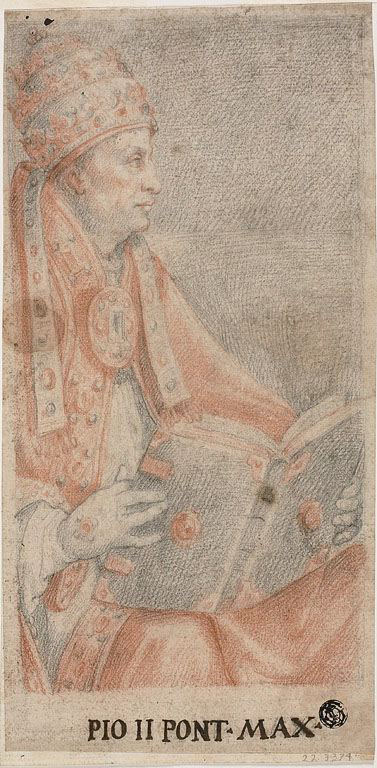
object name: Drawing and Watercolor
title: Pope Pius II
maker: Attributed to Federico Zuccaro; Italian, 1540/41-1609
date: c. 1560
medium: Red and black chalk on cream laid paper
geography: Italy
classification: chalk; drawings (visual works); prints and drawing